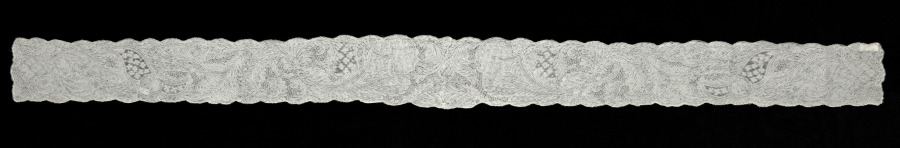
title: Pair of Lace Lappets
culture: France, Valenciennes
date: 1700–1720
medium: Linen: bobbin lace (Valenciennes)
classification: Lace